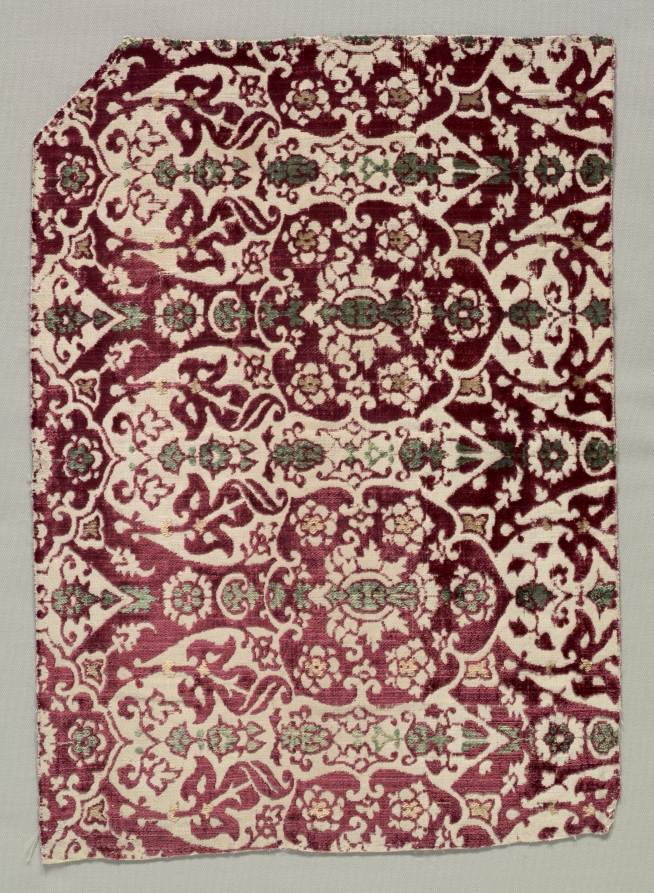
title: Velvet Textile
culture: Turkey, Bursa ?, second half of the 15th century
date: second half of the 15th century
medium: velvet (cut and voided): silk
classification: Velvet